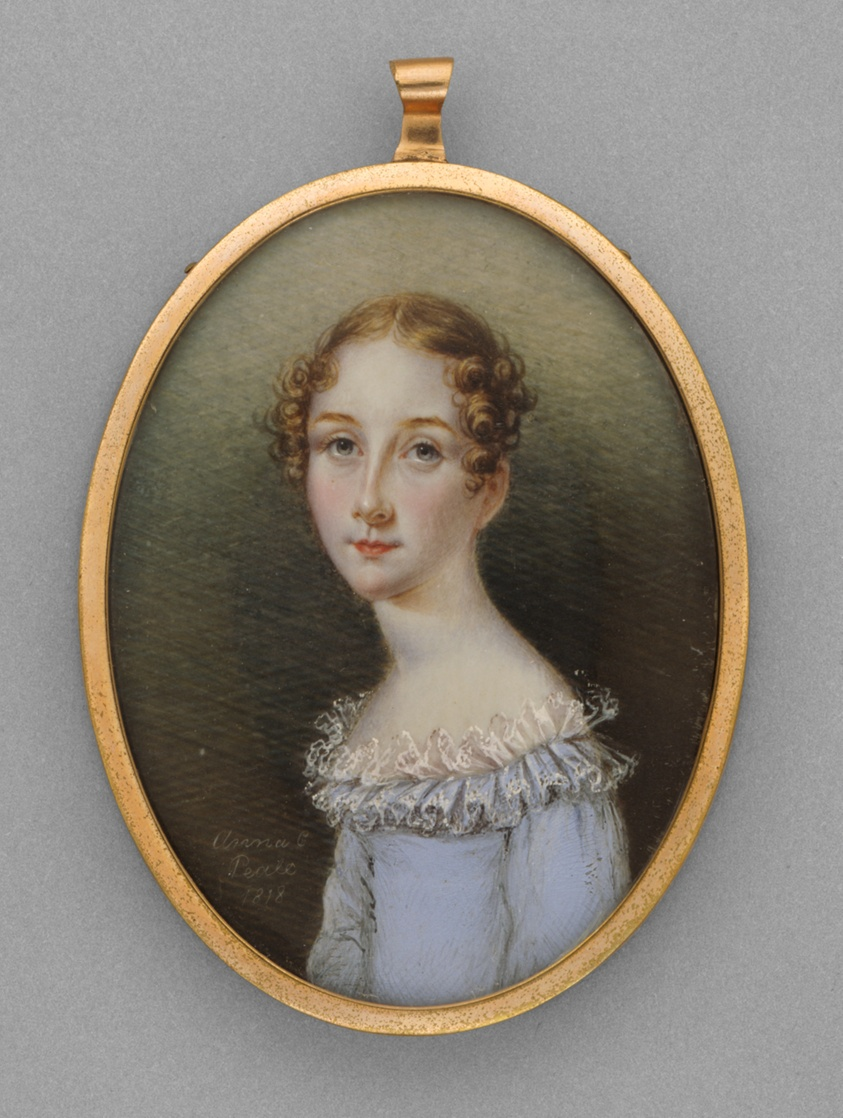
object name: Miniature Painting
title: Portrait of a Woman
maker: Anna Claypoole Peale (American, 1791–1878)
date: 1818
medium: Watercolor on ivory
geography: United States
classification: miniature painting; american arts; miniature; painting